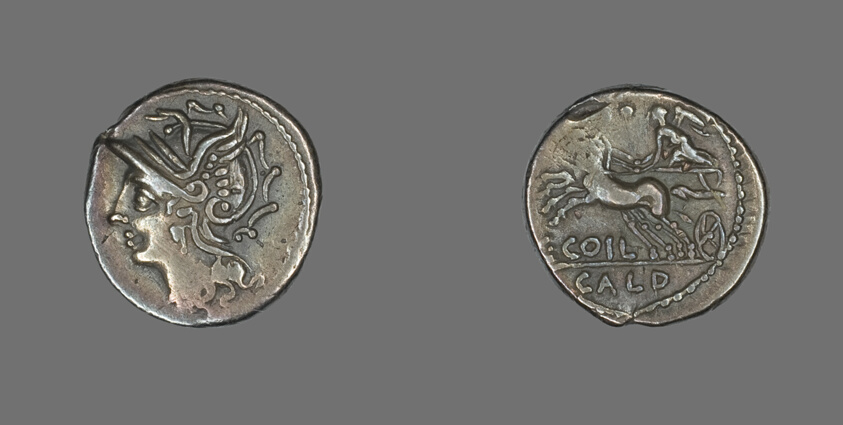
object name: Coin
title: Denarius (Coin) Depicting the Goddess Roma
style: roman (ancient, style or period), ancient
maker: Roman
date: about 104 BCE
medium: Silver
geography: Roman Empire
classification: coin; ancient art